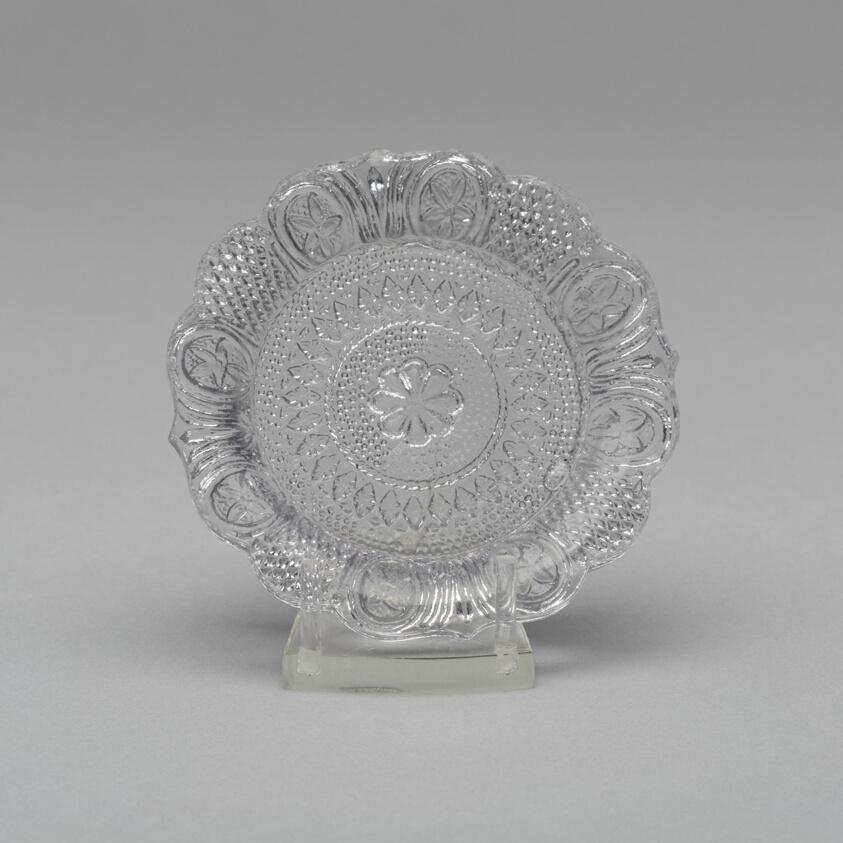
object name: Glass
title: Cup plate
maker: Artist unknown (American, 19th century); Philadelphia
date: 1826–30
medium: Pressed glass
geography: Philadelphia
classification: plate (general, dish); glass; american decorative arts; american arts; decorative arts